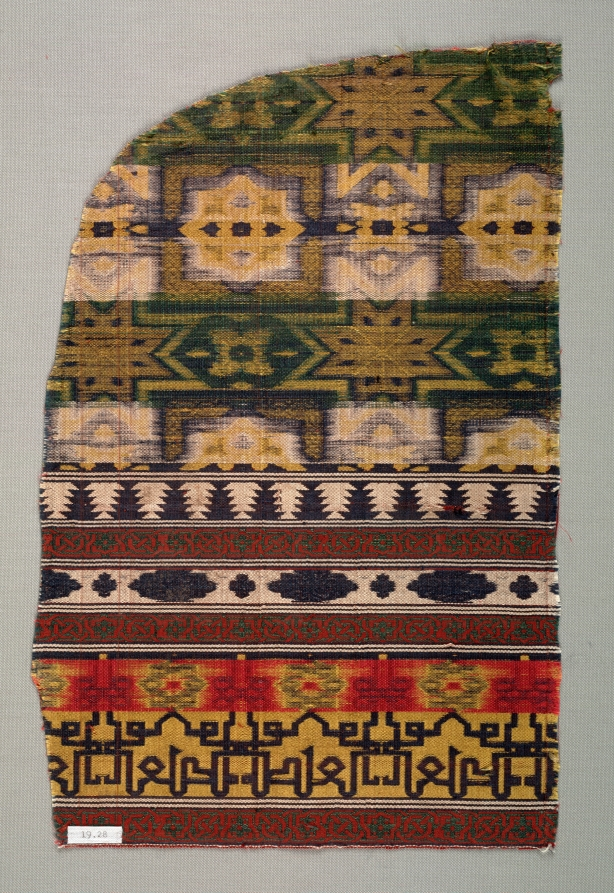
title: Alhambra hanging fragment with decorated bands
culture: Spain, Granada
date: 1300s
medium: Silk: lampas and taqueté weave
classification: Textile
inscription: the principal field of geometric laceria forming stars and squares is bordered by a broad composite band (incomplete) consisting of central wide band with knotted Kufic inscription ("beatitude"), framed by narrower bands with knotwork, Naskhi inscriptions ("success and prosperity") in cartouches and crenallations.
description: The ability to harmoniously combine intricate designs and varied colors was one of the unparalleled achievements of Islamic art. This silk curtain fragment reveals juxtapositions of large- and small-scaled patterns, woven with bold contrasting colors in bands of varying widths. Segments of Arabic text have been woven into the design. The repeated phrase good fortune and prosperity is woven in ivory silk in one of the narrow bands. In the wide band at the bottom, Kufic script in yellow silk extends the word beatitude.